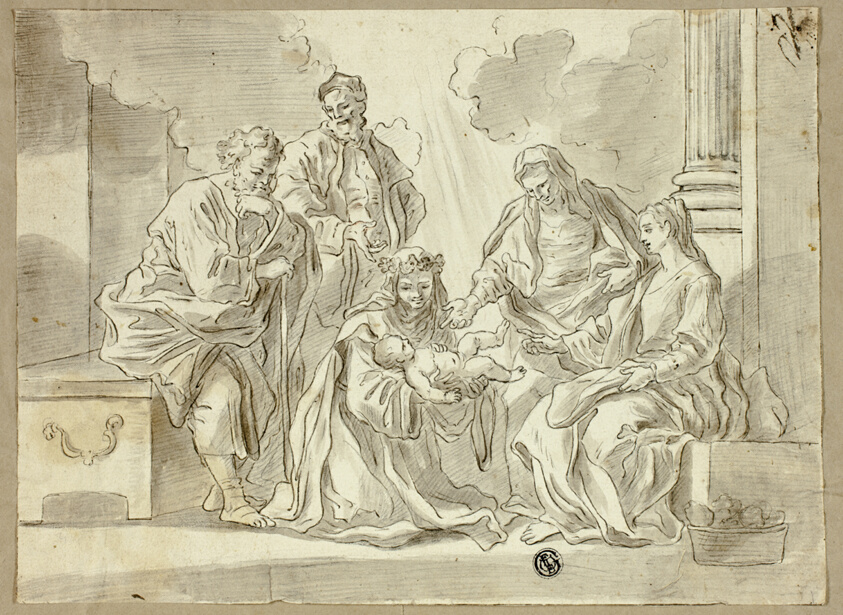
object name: Drawing and Watercolor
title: Holy Family with Saints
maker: After Francesco Solimena; Italian, 1657-1747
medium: Pen and black ink, with brush and brown wash, and black chalk, on ivory laid paper, tipped on brownish-tan wove paper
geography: Italy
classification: pen and ink drawings; drawings (visual works); prints and drawing